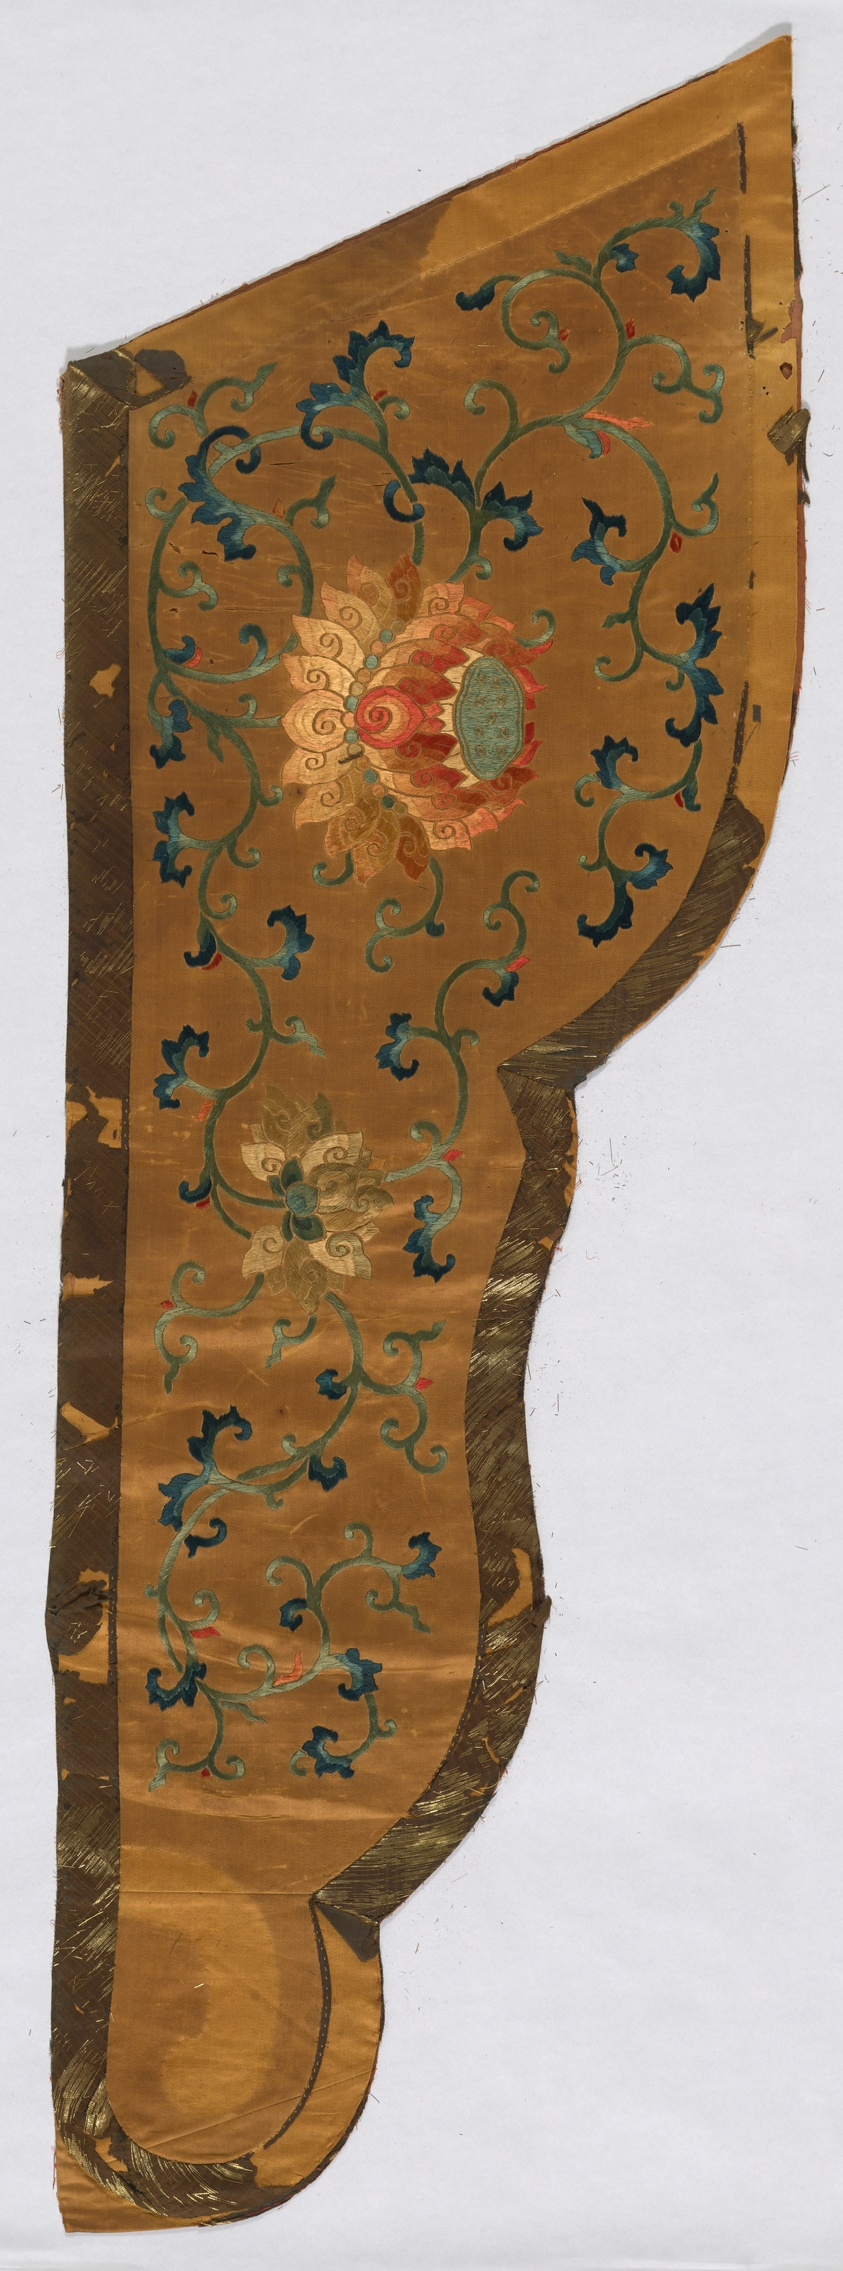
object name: Coverings and Hangings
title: Temple banner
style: qing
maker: China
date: 1700/50, Qing dynasty (1644–1911)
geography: China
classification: textile; needlework (visual works); weaving